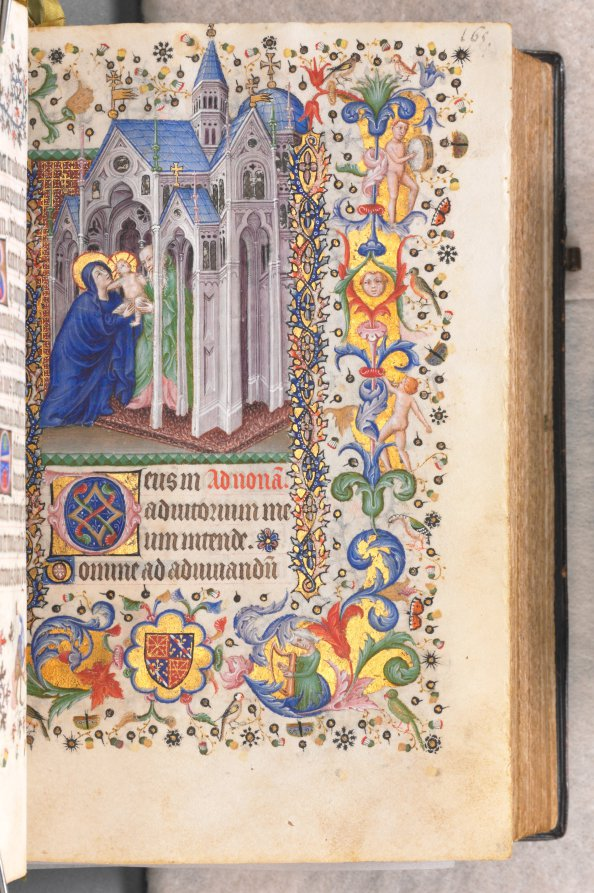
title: Hours of Charles the Noble, King of Navarre (1361-1425): fol. 82vr, Presentation in the Temple (Nones)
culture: France, Paris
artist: Master of the Brussels Initials and Associates (French)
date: c. 1405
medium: ink, tempera, and gold on vellum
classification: Bound Volume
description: This precious volume was obviously highly prized by its owner, the French-born King of Navarre, who had his coat of arms painted on no less than 20 folios. Rather than directly commissioning this manuscript from a specific workshop, it seems that Charles the Noble acquired his book of hours—perhaps ready-made for the luxury market—while on a trip to Paris in 1404–5. A collaborative effort, it contains six painting styles within its pages, those of two Italians, two Frenchmen, and two Netherlanders. The painter who was responsible for the planning and decoration of the book, and who produced 17 of the large miniatures, was a Bolognese artist known as the Master of the Brussels Initials. His principal assistant, responsible for most of the borders, was a Florentine who signed his name "Zecho" da Firenze on folio 208 verso.